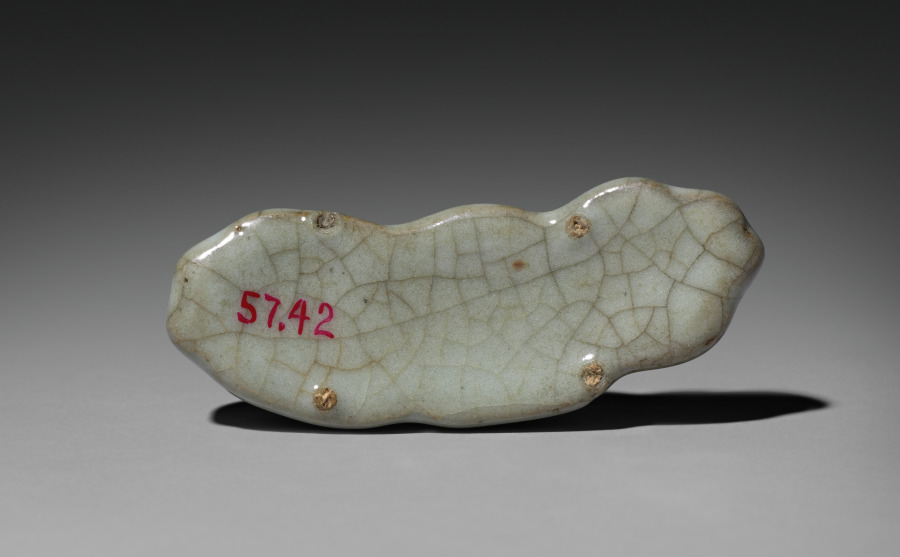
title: Brush Rest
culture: Southeast China, Zhejiang province, Southern Song dynasty (1127–1279)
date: 1127–1279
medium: glazed stoneware, Guan ware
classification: Ceramic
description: This brush rest, shaped like a mountain range, is covered with a thick and soft gray-blue crackled Guan ware glaze that pools in the deeper areas, giving the mountain range a hazy appearance as if enshrouded in white mists. Guan ware was produced in the imperial kilns in Hangzhou, the Southern Song dynasty capital.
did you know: There are twelve "hills" on this mountain-shaped brush rest.